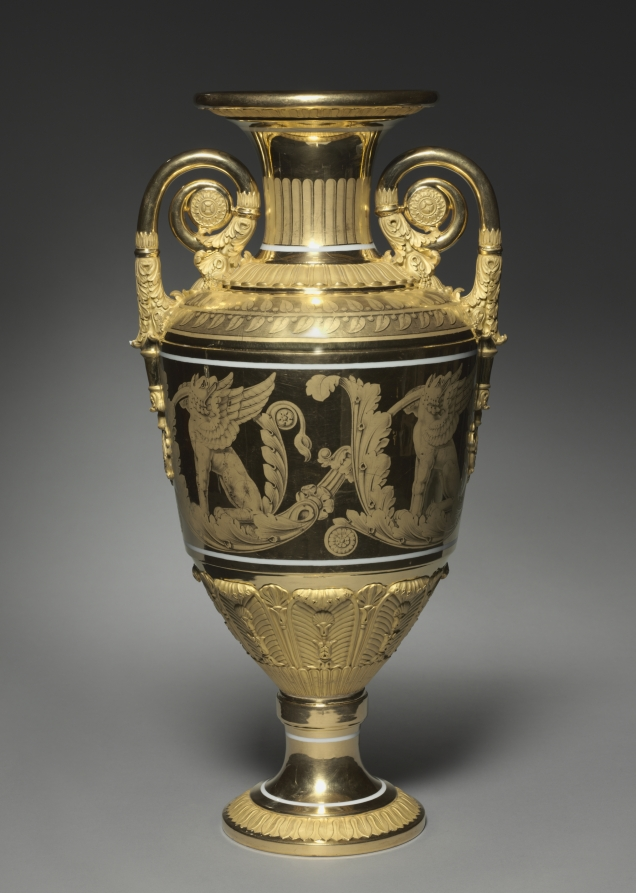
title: Vase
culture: Russia, St. Petersburg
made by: St. Petersburg Imperial Porcelain Factory (Russian)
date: c. 1820–1830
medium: gilt porcelain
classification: Ceramic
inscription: inscribed: "Moreau" in gold near lip.